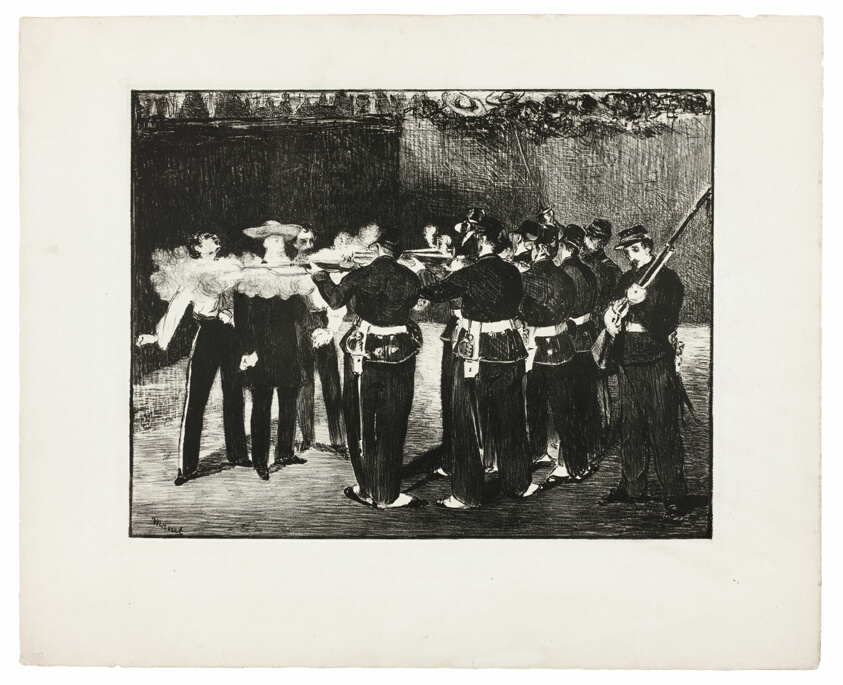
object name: Print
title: The Execution of Maximilian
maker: Édouard Manet (French, 1832-1883)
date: 1867–68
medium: Lithograph in black, with scraping, on ivory chine laid down on ivory wove paper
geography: France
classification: lithograph; print; prints and drawing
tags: war